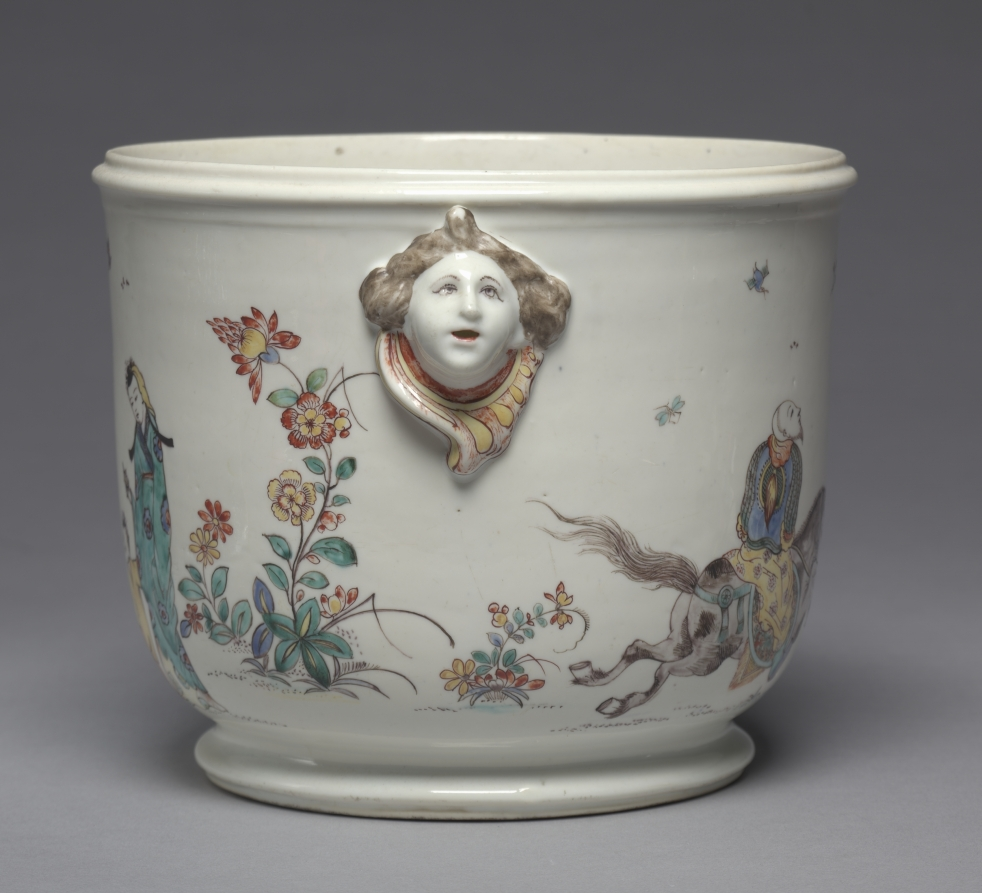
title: Bottle Cooler (seau a bouteille)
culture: France, Mennecy, 18th century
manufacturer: Mennecy- Villeroy Factory (French)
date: c. 1755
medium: Tin-glazed soft-paste porcelain with enamel decoration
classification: Ceramic